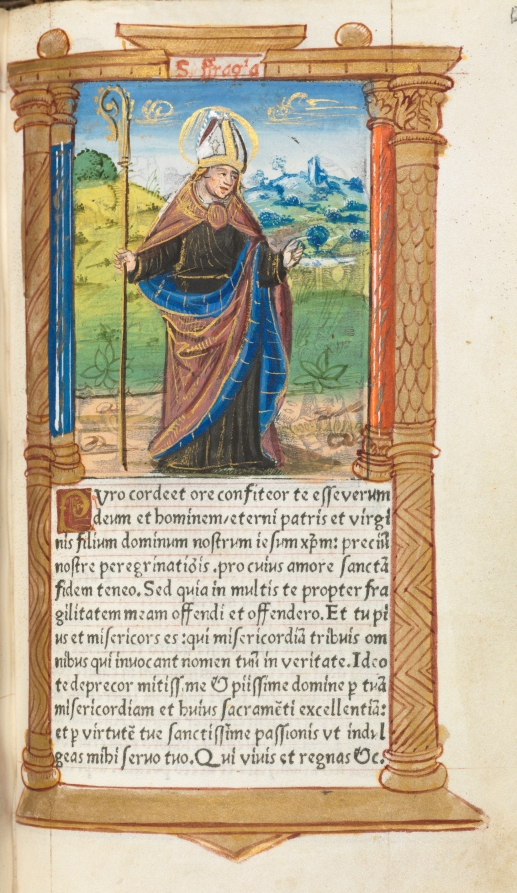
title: Printed Book of Hours (Use of Rome): fol. 96r, St. Augustine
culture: France, Paris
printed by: Guillaume Le Rouge (French, Paris, active 1493–1517)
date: 1510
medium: 112 Printed folios on parchment, bound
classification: Bound Volume